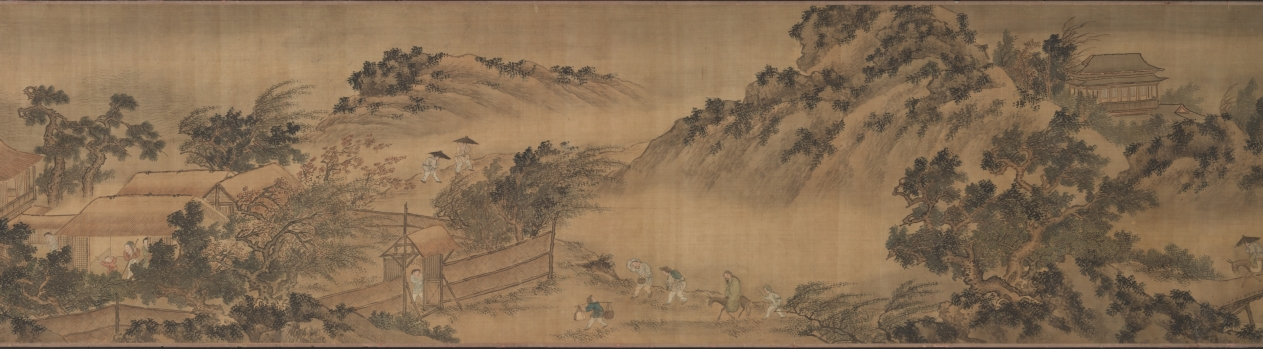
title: Returning to the Village in a Rainstorm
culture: China, Ming dynasty (1368–1644)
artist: Xie Shichen (Chinese, 1487–after 1567)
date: 1530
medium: Handscroll; ink and light color on silk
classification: Painting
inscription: 風雨歸村圖 嘉靖庚寅秋日樗仙謝時臣. [印] 謝時臣印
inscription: 3 additional seals unidentified.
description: This scroll depicts a wind- and rainswept landscape with figures in the countryside struggling against a late summer monsoon rainstorm. Such weather was familiar to residents of the lower Yangzi delta. Xie Shichen spent most of his life in the Suzhou area. Details of his career are scant, but his surviving works suggest that he made his living as a professional painter. This painting conveys drama and anecdotal observations, characteristic of Zhe school paintings, such as the one by Lü Wenying, CMA 1970.76.